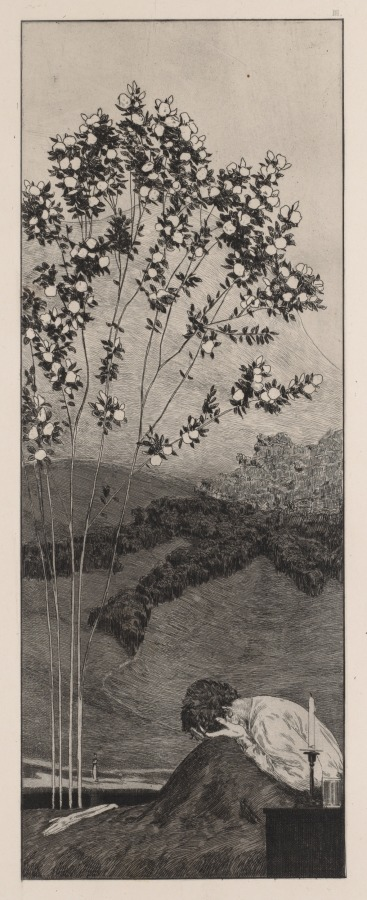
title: A Glove: Desires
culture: Germany, 19th century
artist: Max Klinger (German, 1857–1920)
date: 1880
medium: etching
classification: Print